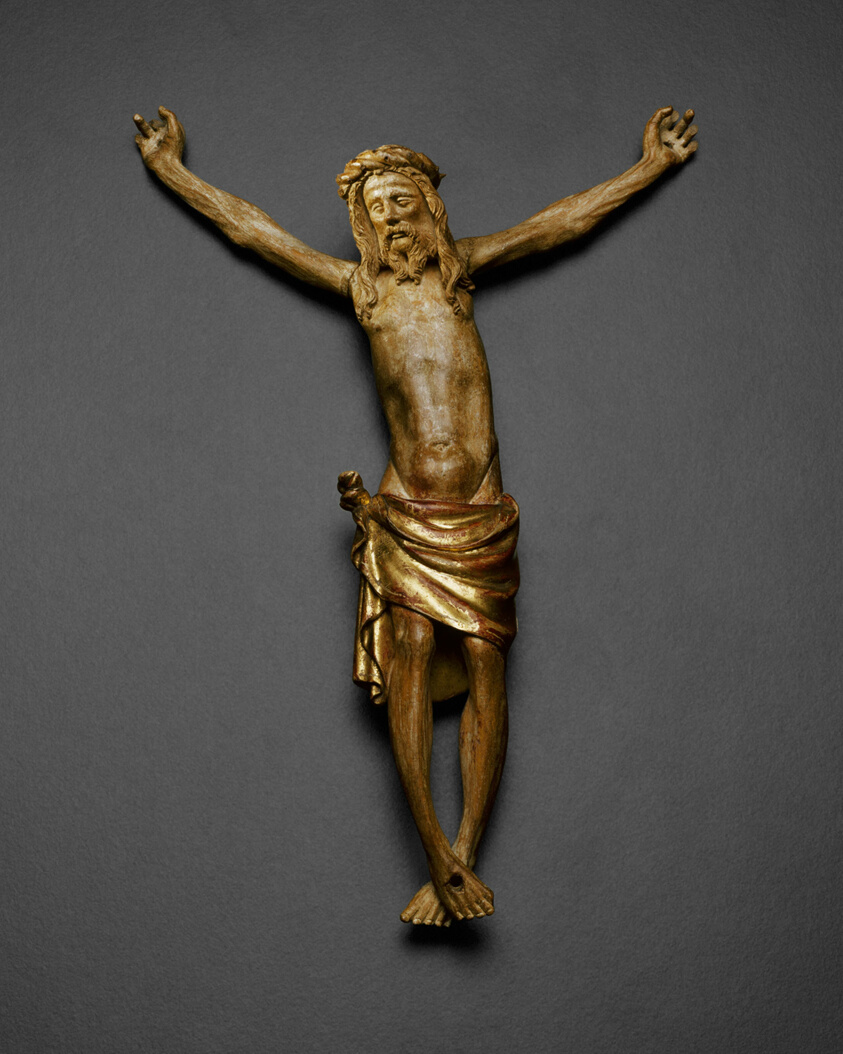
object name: Sculpture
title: Corpus of Christ, from the Altarpiece of the Crucifixion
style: 14th century, Renaissance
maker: Jacques de Baerze (Netherlandish, active before 1384–1399); Melchior Broederlam (Netherlandish, about 1355–about 1411)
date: 1391–99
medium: Walnut with gilding and traces of polychromy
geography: Flanders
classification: statuette; crucifixion; sculpture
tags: religion, religious scenes, religious figures, Christianity, Christian subjects, biblical, altar, crucifixions, gold (color), Jesus